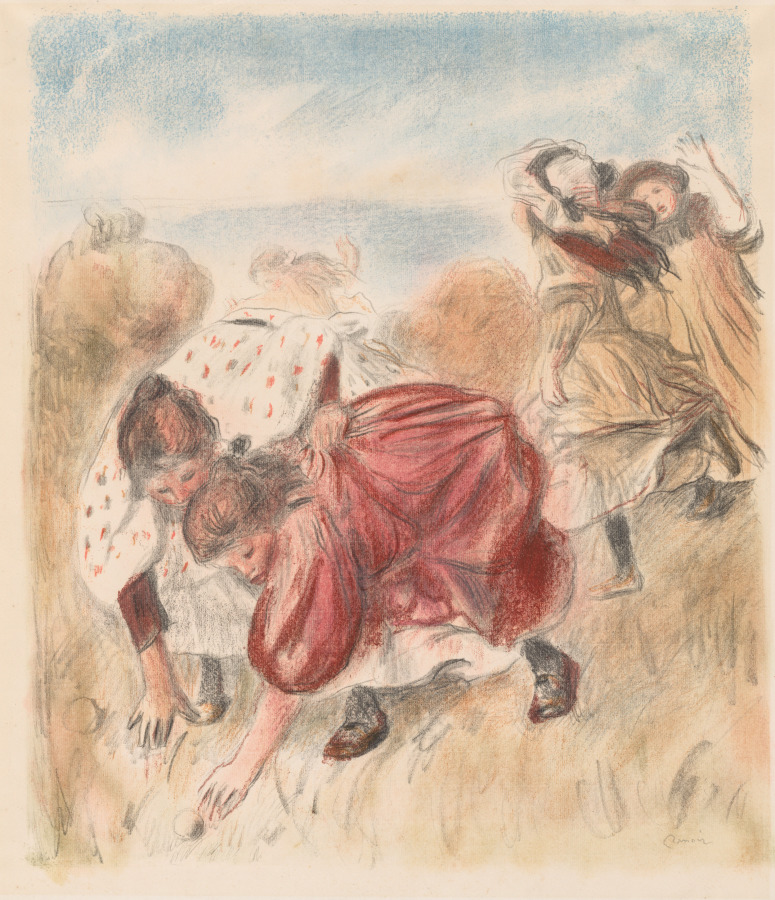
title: Children Playing Ball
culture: France, late 19th-early 20th Century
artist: Pierre-Auguste Renoir (French, 1841–1919)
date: 1900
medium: lithograph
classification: Print